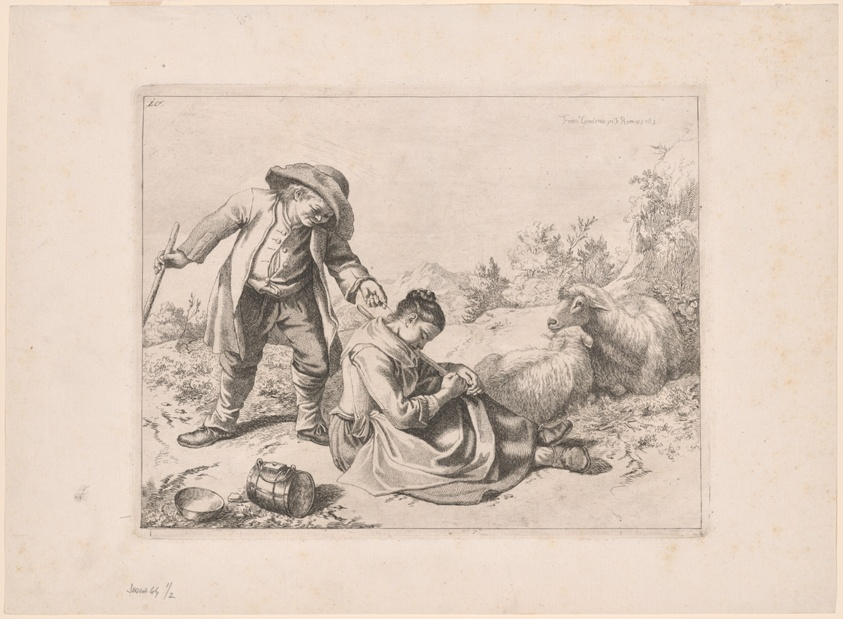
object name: Print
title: Plate 10, from The Set of 12 Pastorals Scenes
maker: Francesco Londonio (Italian, 1723-1783)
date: 1762-63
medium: Etching in black on ivory laid paper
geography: Italy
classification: print; etching; paper; prints and drawing